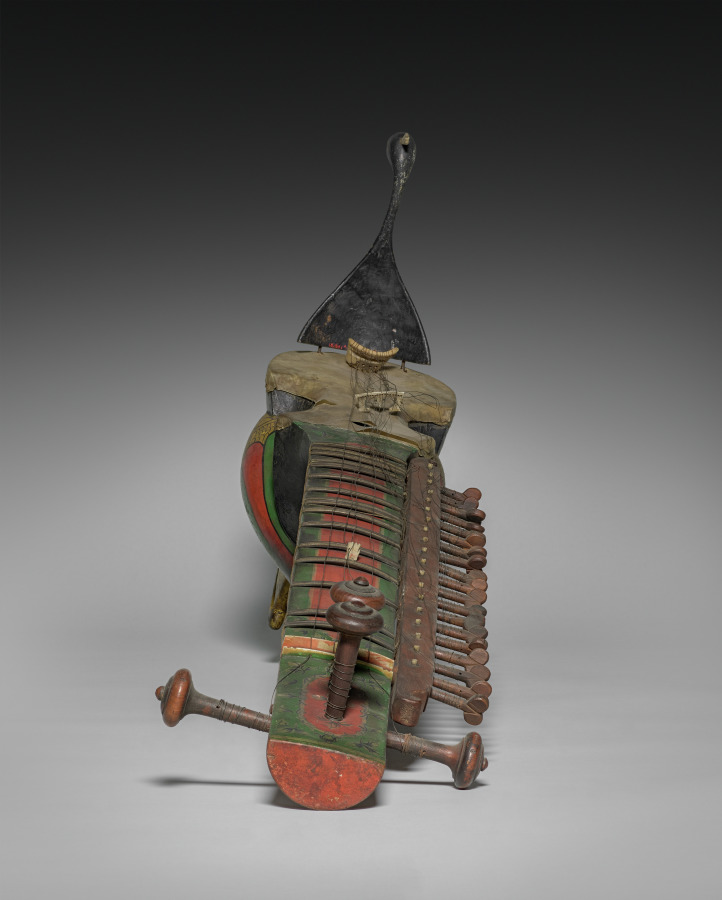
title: Taus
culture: India, Punjab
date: c. 1800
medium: Polychromed wood, parchment, bone or ivory, gut, and metal strings; frets: bronze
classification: Musical Instrument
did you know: The taus was designed by a Sikh Guru to combine the sounds of string instruments and the plaintive cry of the peacock.